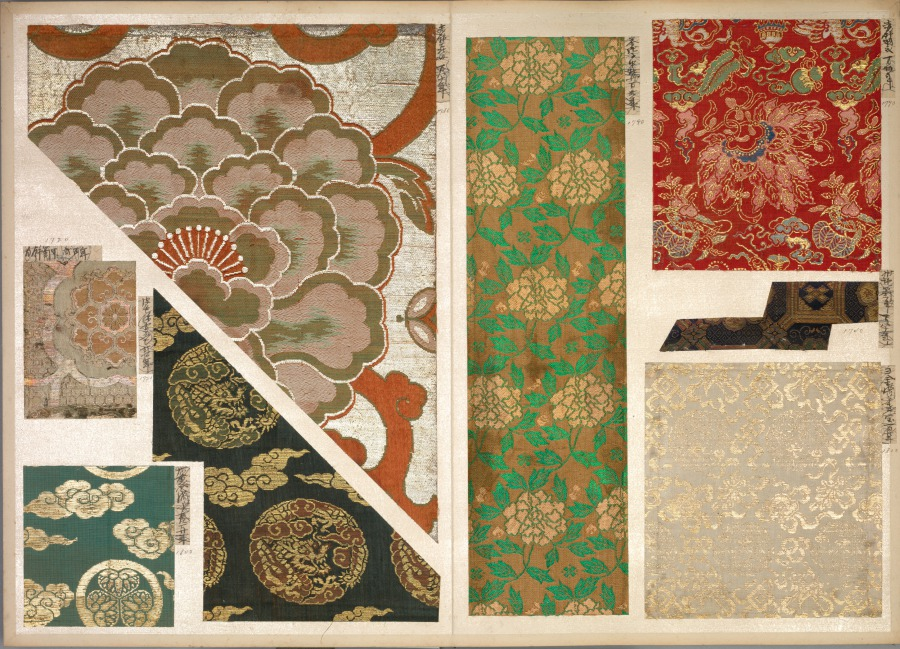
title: Album of Textile Samples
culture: Japan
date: 1790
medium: silk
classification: Textile